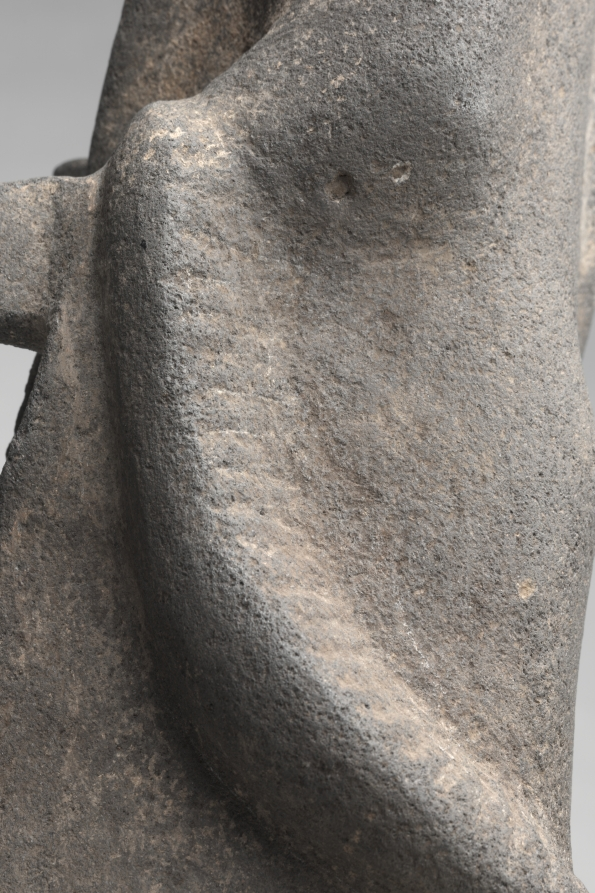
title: Priest-King or Deity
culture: Hittite, North Syria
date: c. 1600 BCE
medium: basalt with bone eyes (left, ancient; right, restored)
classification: Sculpture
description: The Hittites migrated into Anatolia in the 3rd millennium BCE and spoke an Indo-European language, a group that includes Greek, Latin, Persian, Sanskrit, English, and most modern European languages. They were the first ancient people to use iron for weapons. From about 1600–1200 BCE their empire was at its peak, extending from central Anatolia to Syria, and south along the eastern Mediterranean. Their vast empire and interest in commerce enabled the Hittites to spread Mesopotamian ideas and culture throughout the ancient Mediterranean world. This large basalt sculpture is exceptionally rare in depicting a Hittite god or priest-king wearing a horned conical crown, false beard, and long robe. He holds a bowl in his right hand and once held something in his left, perhaps a staff or sword.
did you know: The left eye of the sculpture is the original bone inlay while the right eye is a modern restoration done after the piece was damaged.